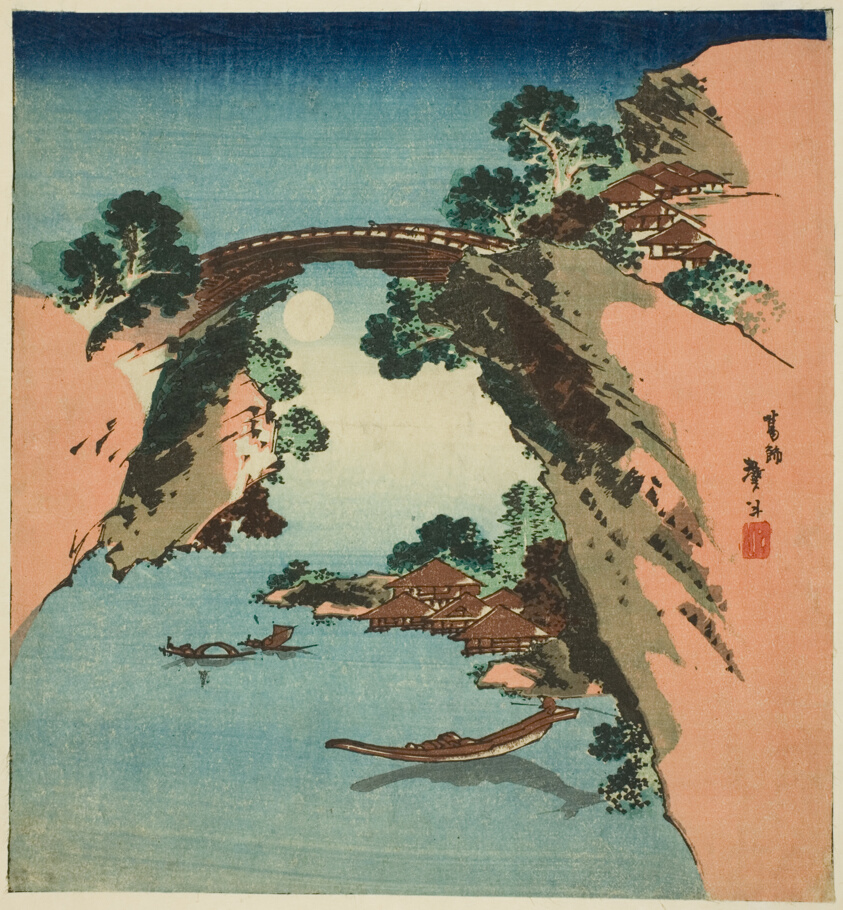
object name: Print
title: Monkey Bridge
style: Japanese (culture or style)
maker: Katsushika Taito II (Japanese, active c. 1810-53)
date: c. 1830/44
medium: Color woodblock print; section of harimaze sheet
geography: Japan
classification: woodblock print; print; asian art